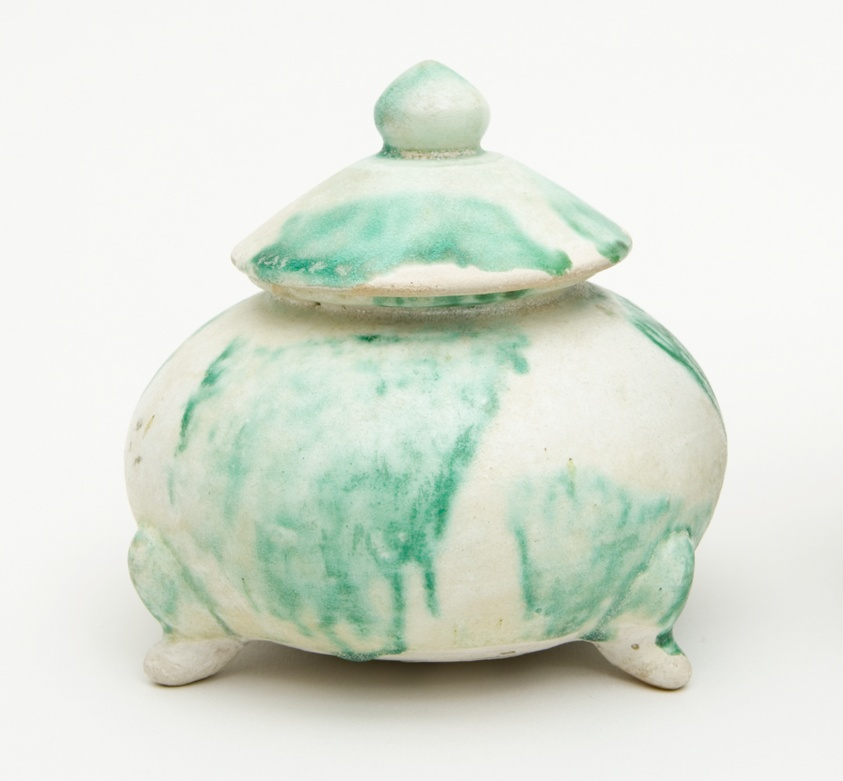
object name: Vessel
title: Tripod Jar with Lid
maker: China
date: Tang dynasty (618–906)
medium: Earthenware with green-splashed lead glaze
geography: China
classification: vessel